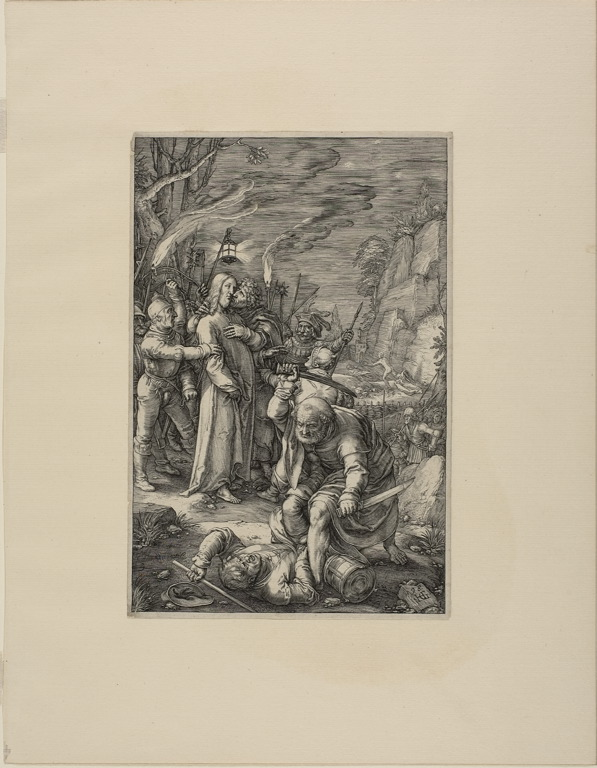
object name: Print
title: The Betrayal of Christ, plate three from The Passion of Christ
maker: Hendrick Goltzius (Dutch, 1558-1617)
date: 1598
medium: Engraving in black ink on cream paper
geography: Netherlands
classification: engraving; prints and drawing; portfolio; print